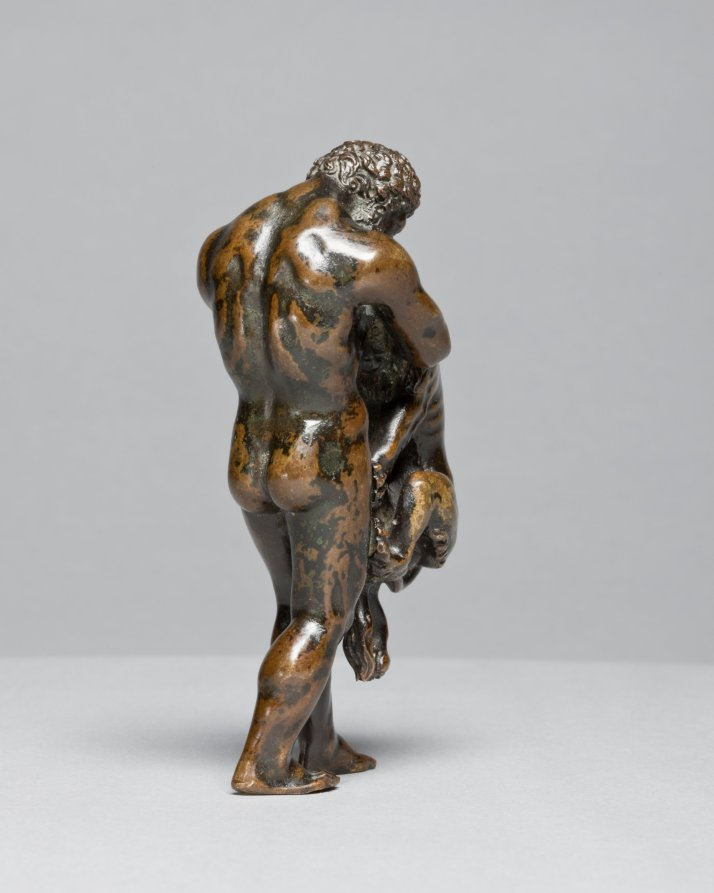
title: Hercules and the Nemean Lion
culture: Italy or France, 16th century or later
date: 1500s or later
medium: bronze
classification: Sculpture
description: The original owner of this work would have understood that this scene referred to the entire story of Hercules, the demi-god who had to accomplish twelve labors. The lion is named after the city of Nemea, near Corinth, a monstrous beast sent by the goddess Hera to wreak havoc on the area. After killing the lion, Hercules wore his pelt, commonly seen in other representations of the hero.